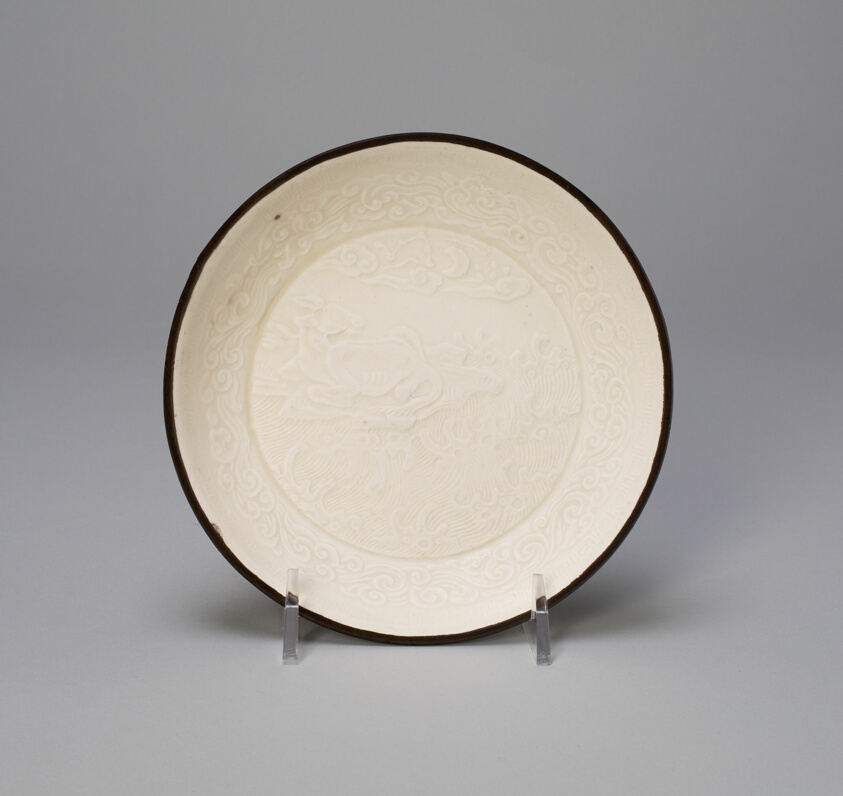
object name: Vessel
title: Dish with Mythical Bovine (Xiniu) amid Waves Viewing the Moon and Constellations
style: Chinese (culture or style)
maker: China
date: Jin dynasty (1115–1234), 12th century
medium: Ding ware; porcelain with underglaze molded decoration; metal rim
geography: China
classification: dish (vessel); porcelain; asian art; ceramics; vessel